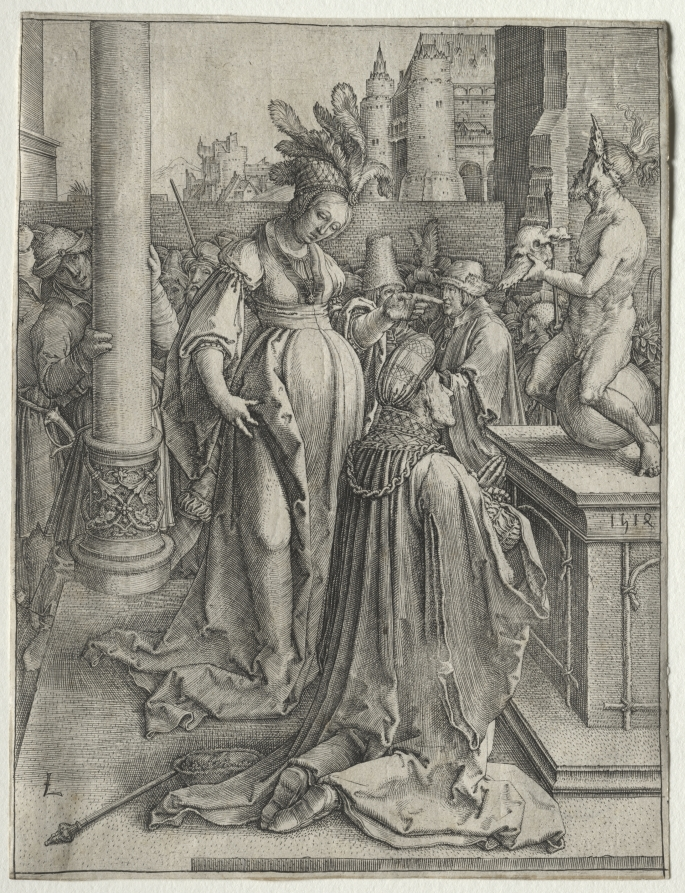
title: Solomon's Idolotry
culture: Netherlands, 16th century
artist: Lucas van Leyden (Netherlandish, 1494–about 1533)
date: 1514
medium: engraving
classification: Print